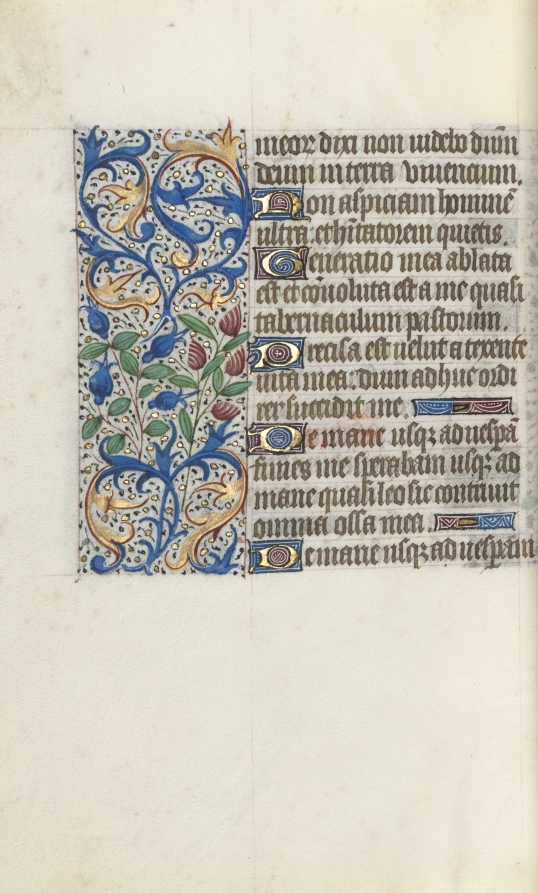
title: Book of Hours (Use of Rouen): fol. 139v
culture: France, Rouen, 15th century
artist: Master of the Geneva Latini (French, active Rouen, 1460–80)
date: c. 1470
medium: ink, tempera, and gold on vellum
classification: Bound Volume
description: In the late 1400s and early 1500s Rouen was an established and important center of book production. The city’s cathedral had a wealthy chapter that spent large sums of money to commission books and to maintain its extensive library. The stationers and booksellers would have likely been concentrated in or near the cathedral precinct. This artist, named after a manuscript now in Geneva, was Rouen’s principal illuminator during the second half of the 1400s.